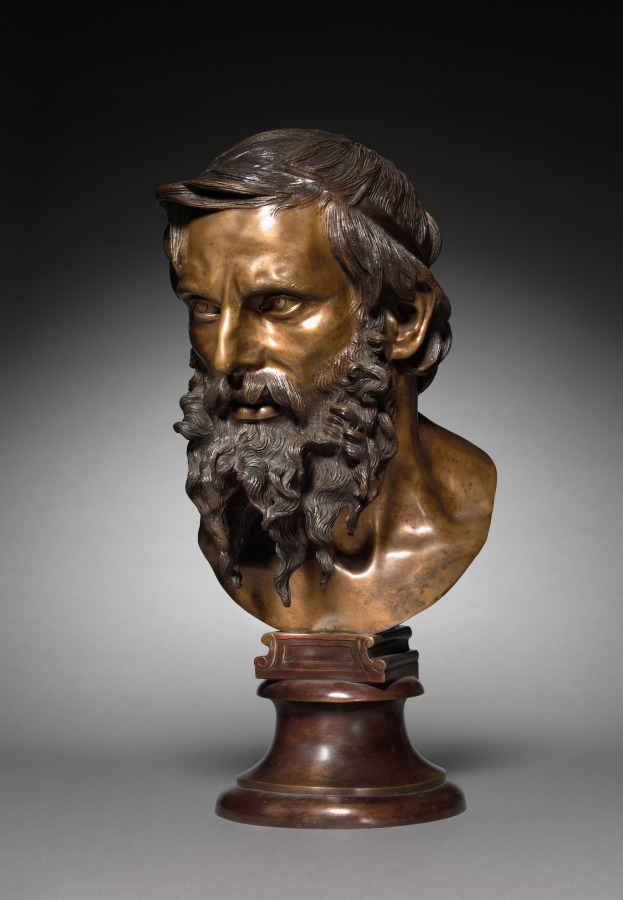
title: Head of a Philosopher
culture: Italy, 19th century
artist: Vincenzo Gemito (Italian, 1852–1929)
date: 1883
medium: bronze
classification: Sculpture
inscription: Signed: "Gemito"; stamped: "FONDERIA GEMITO NAPOLI"